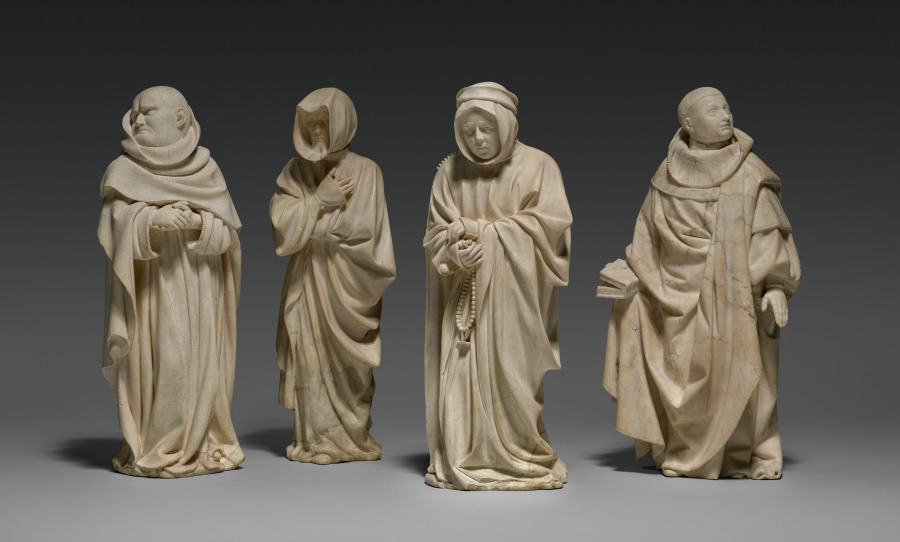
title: Mourner from the Tomb of John the Fearless and Margaret of Bavaria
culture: Spanish, Burgundy, Dijon, 15th century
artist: Jean de la Huerta (Spanish, active Burgundy, 1431–62)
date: 1443–45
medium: salins alabaster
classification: Sculpture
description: This monklike figure has a variously textured monochrome surface. Alabaster’s softness made it easy to carve details like the fabric and fur of the mourner’s robe and the codex pages in his hand. This is one of 40 mourners from an elaborate funeral procession beneath an intricately carved alabaster arcade. This mourner comes from the monastery of Champmol near Dijon, which became a primary burial place for Burgundian dukes. The sculpture was part of the tomb of John the Fearless (1371–1419), commissioned by his son Philip the Good (1396–1467), modeled after the earlier monument for Philip the Bold.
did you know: A plaster cast of this mourner adorns the Tomb of John the Fearless and Margaret of Bavaria in Dijon, France.